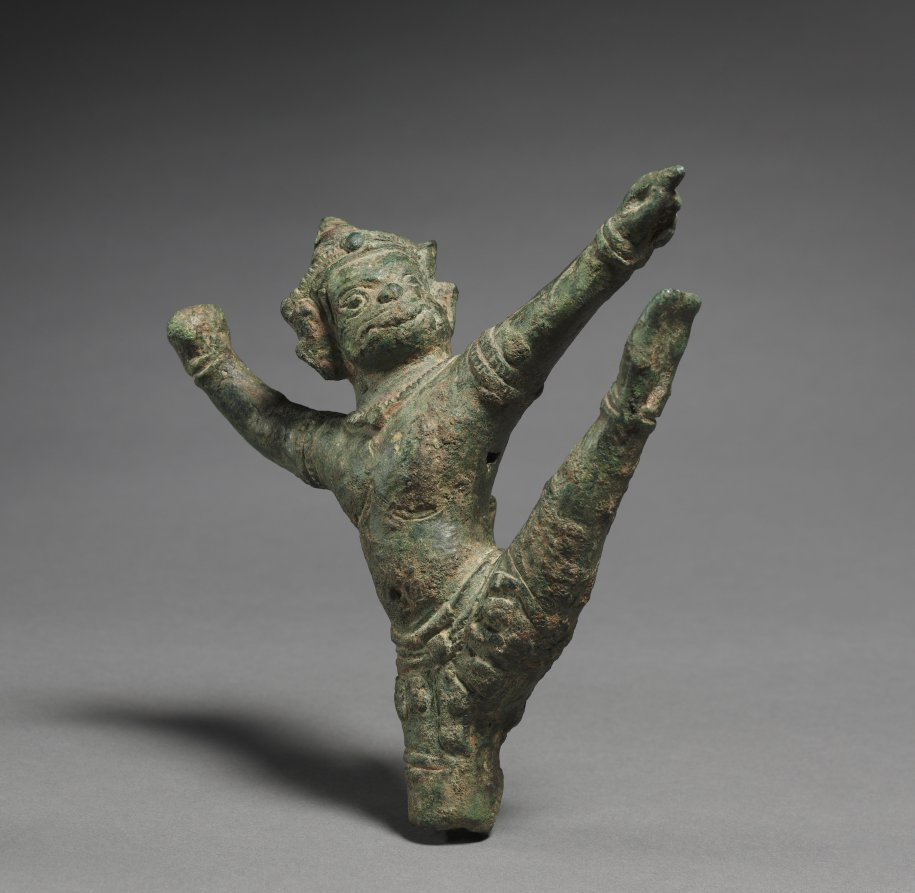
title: Hanuman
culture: Cambodia, Angkor, Bayon style, 12th Century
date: 1100s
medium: bronze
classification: Sculpture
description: When posed in this powerful and exuberant manner, the image of Hanuman stood at the top of a standard. As the son of the wind god and the most powerful of the primeval forest-dwellers, who are depicted with the head and tail of a monkey and the body of a man, Hanuman as an emblem spelled success in battle.